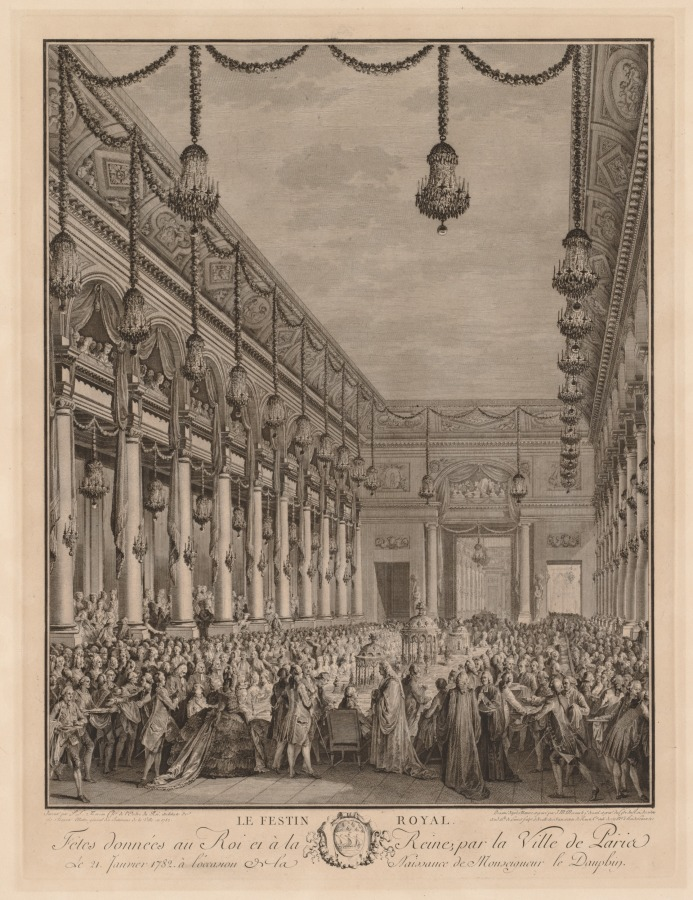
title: The Royal Banquet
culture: France, 18th century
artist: Jean-Michel the Younger Moreau (French, 1741–1814)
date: 1782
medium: engraving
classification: Print